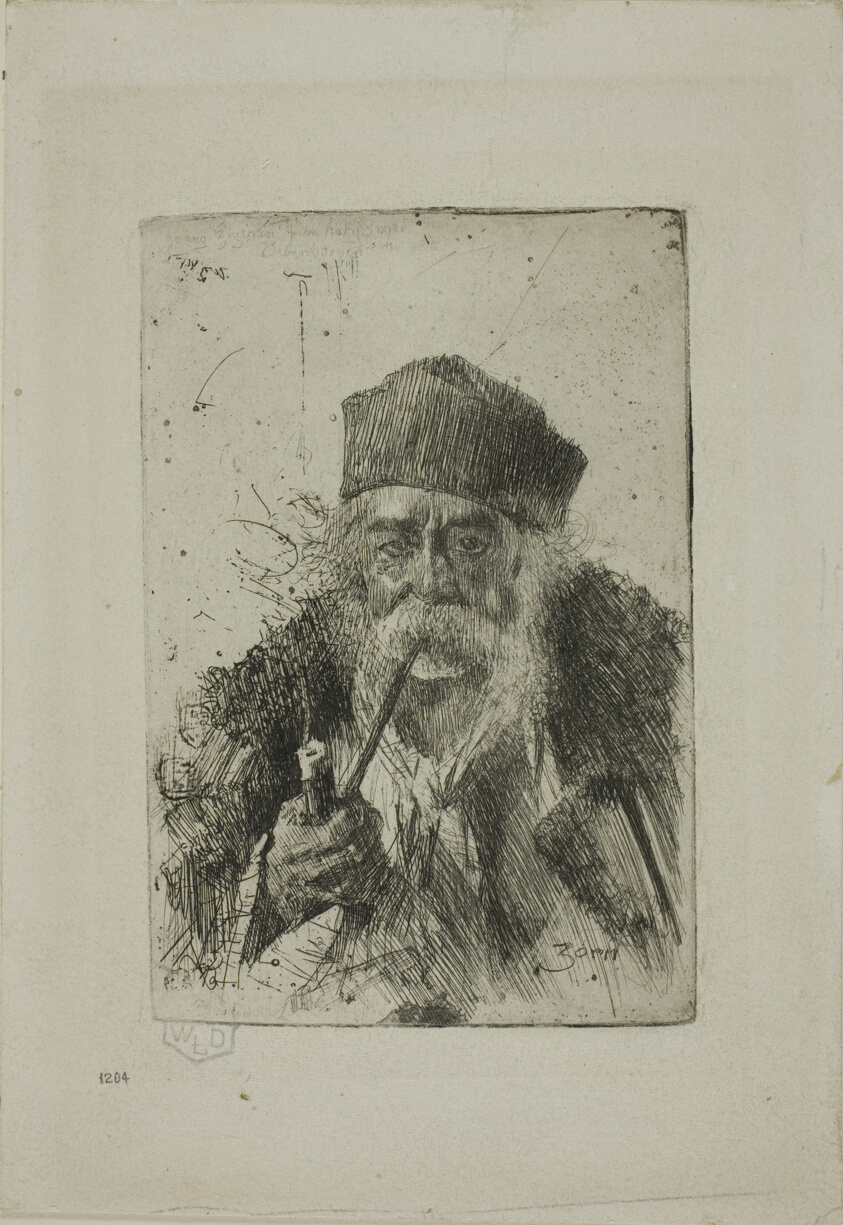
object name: Print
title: Executioner from Siebenbürgen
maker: Anders Zorn (Swedish, 1860-1920)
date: 1885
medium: Etching on ivory wove paper mounted on gray paper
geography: Sweden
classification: print; prints and drawing